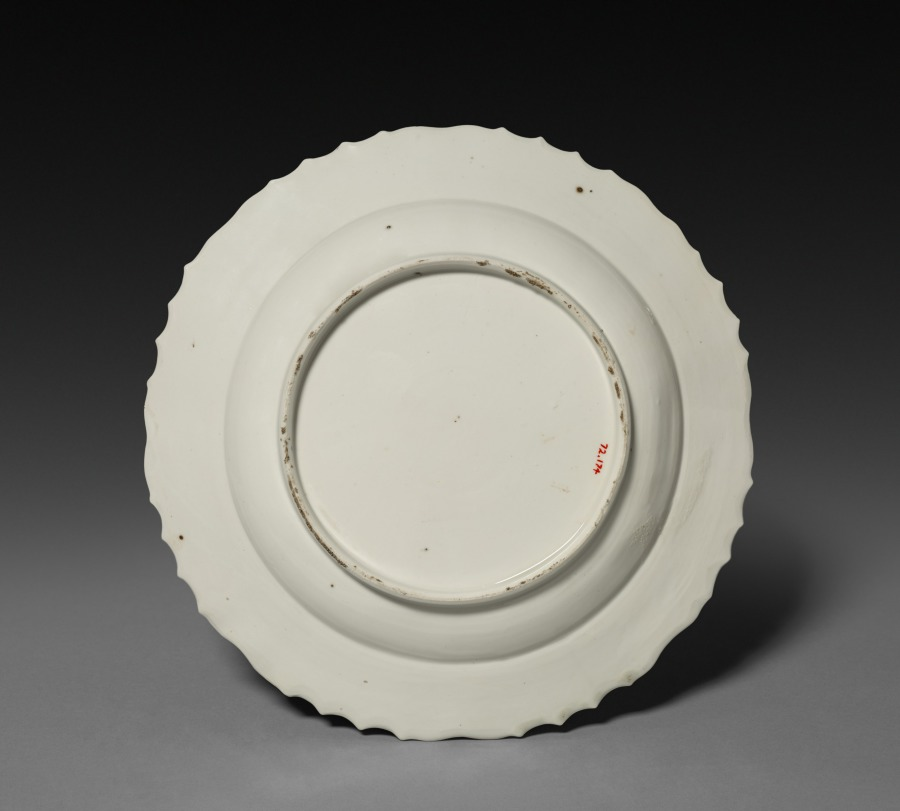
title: Plate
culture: Belgium, Tournai, 18th century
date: c. 1750–1775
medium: porcelain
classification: Ceramic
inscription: incised on bottom: 4.